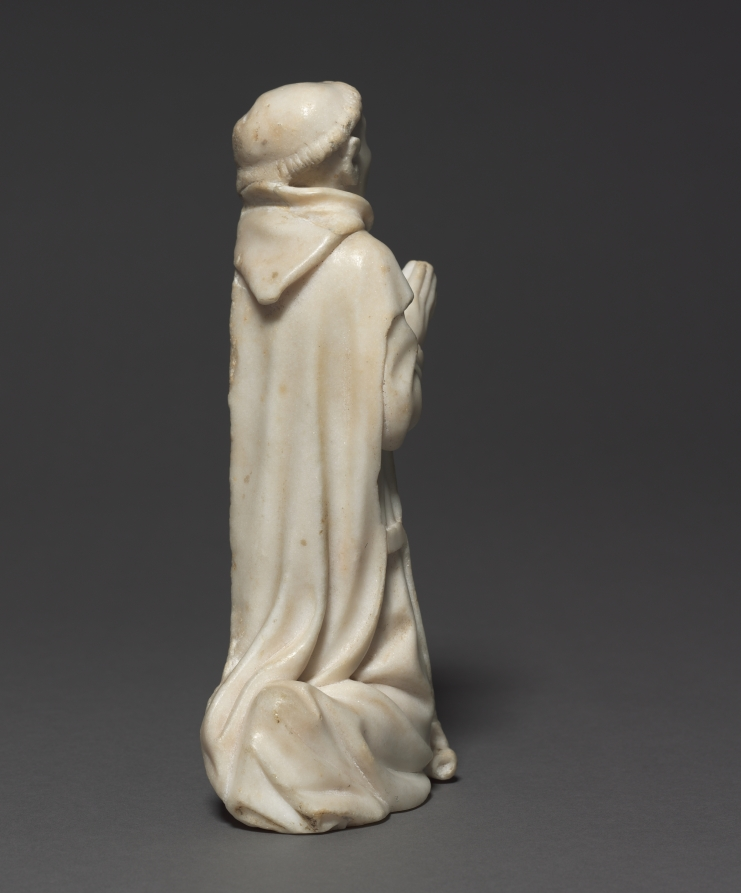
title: Kneeling Carthusian Monk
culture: France, Burgundy, Dijon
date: c. 1380–1400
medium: marble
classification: Sculpture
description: These are the only known surviving sculpted examples of kneeling Carthusian monks. Depictions of Carthusians in the same act of piety are found in paintings such as the one in this room from the Chartreuse de Champmol. These two figures are believed to come from the same Carthusian monastery as the mourners displayed nearby and would have formed part of a private devotional group, probably in a monk’s cell, with a sculpture of the crucified Christ or the Virgin positioned between them. They wear the recognizable white scapular, a hooded garment with front and back panels tied together with a tab.